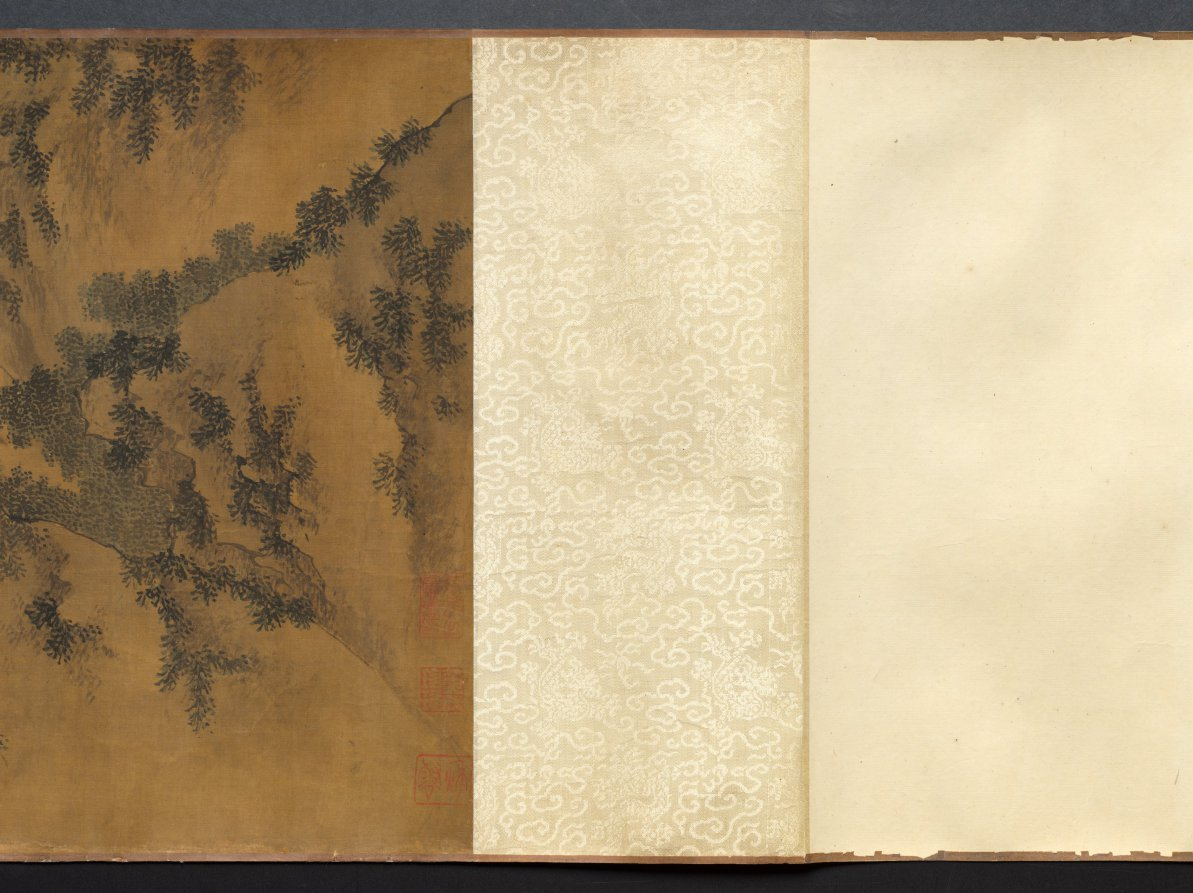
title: Returning to the Village in a Rainstorm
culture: China, Ming dynasty (1368–1644)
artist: Xie Shichen (Chinese, 1487–after 1567)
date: 1530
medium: Handscroll; ink and light color on silk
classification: Painting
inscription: 風雨歸村圖 嘉靖庚寅秋日樗仙謝時臣. [印] 謝時臣印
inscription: 3 additional seals unidentified.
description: This scroll depicts a wind- and rainswept landscape with figures in the countryside struggling against a late summer monsoon rainstorm. Such weather was familiar to residents of the lower Yangzi delta. Xie Shichen spent most of his life in the Suzhou area. Details of his career are scant, but his surviving works suggest that he made his living as a professional painter. This painting conveys drama and anecdotal observations, characteristic of Zhe school paintings, such as the one by Lü Wenying, CMA 1970.76.